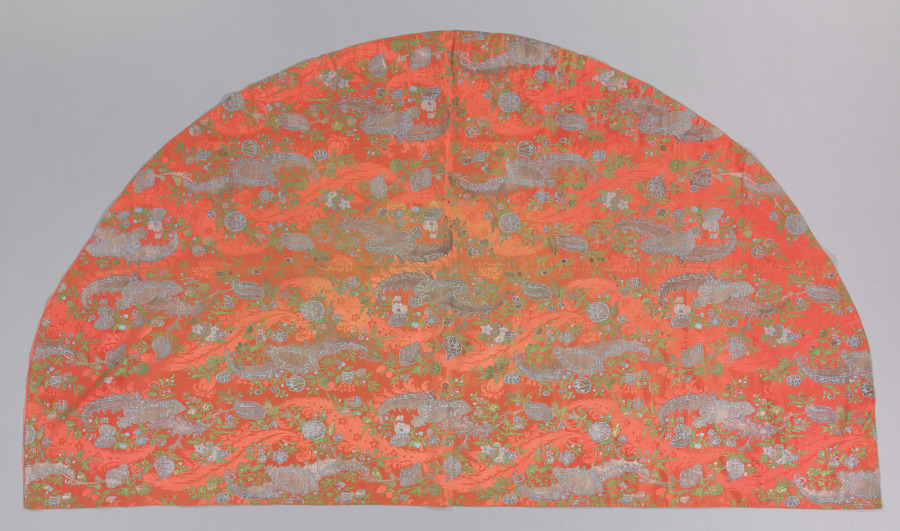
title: Fragment of a Cope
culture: Italy, Venice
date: 1700s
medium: brocade; silk and metal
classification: Textile